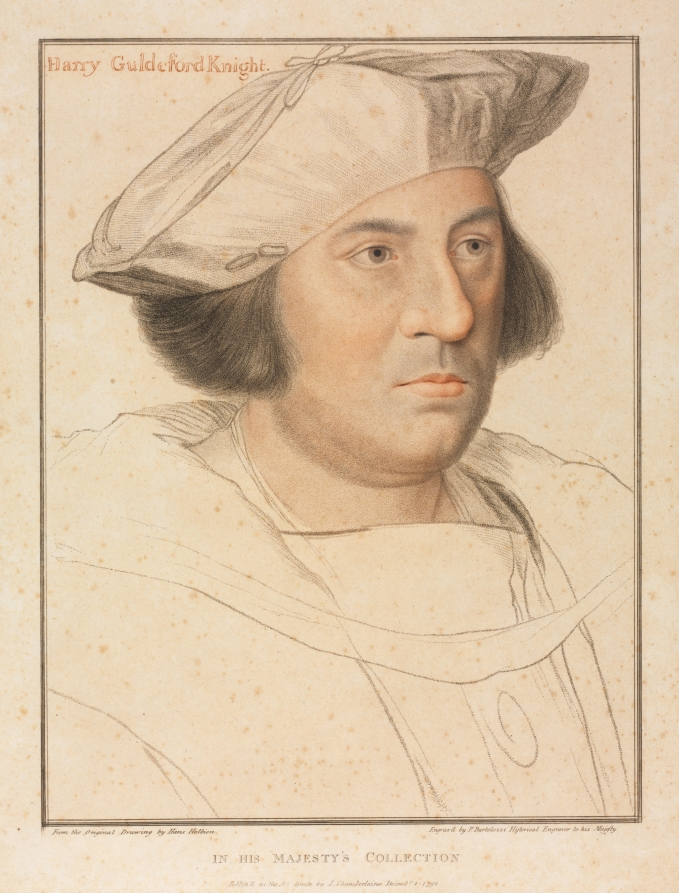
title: Sir Henhy Guldeford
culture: England, 18th century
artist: Francesco Bartolozzi (British, 1727–1815)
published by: John Chamberlaine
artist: after Hans Holbein (German, c. 1465–1524)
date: 1792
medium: color stipple engraving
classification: Print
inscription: In pen and ink: "1792" On plate, upper left: "Harry Guldeford Knight" On plate, below image: "From the Original Drawing by Hans Holbein Engraved by F. Bartolozzi R.A. Historical Engraver to his Majesty / IN HIS MAJESTY'S COLLECTION / Published as the Act Directs Decemb.r I., 1792 by J. Chamberlaine"